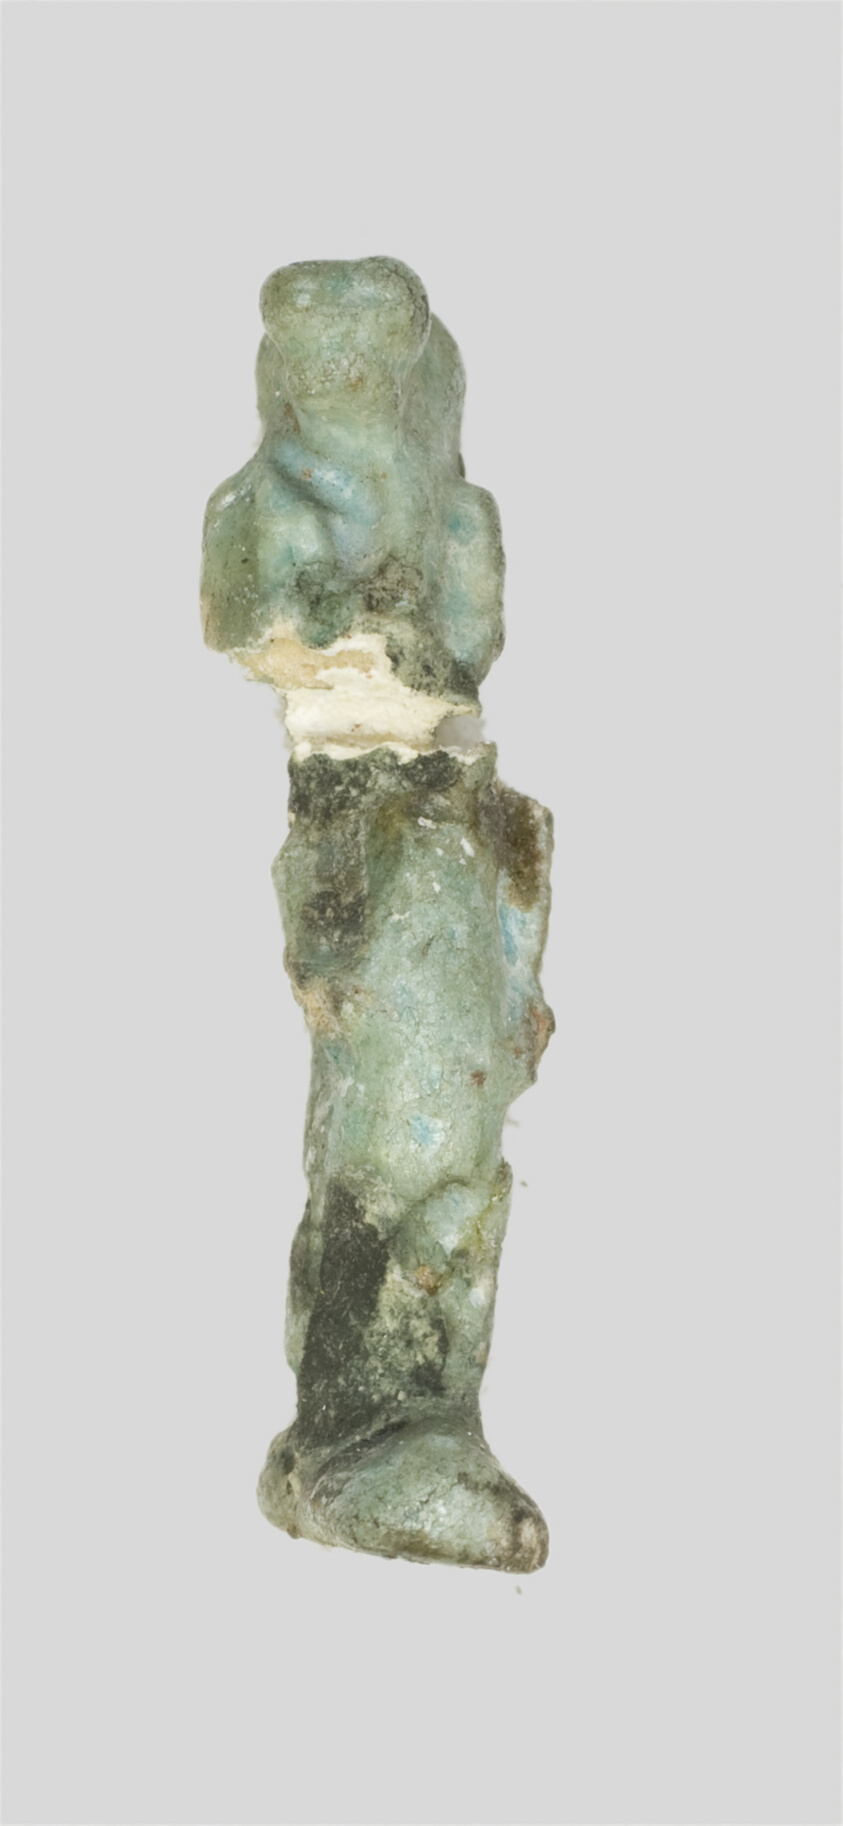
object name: Costume and Accessories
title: Amulet of the Goddess Taweret (Thoeris)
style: egyptian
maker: Egyptian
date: Third Intermediate Period–Late Period, Dynasties 21–31 (about 1069–332 BCE)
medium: Faience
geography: Egypt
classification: amulet; jewelry; ceramics; ancient art; costume; faïence (composite material)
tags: goddesses